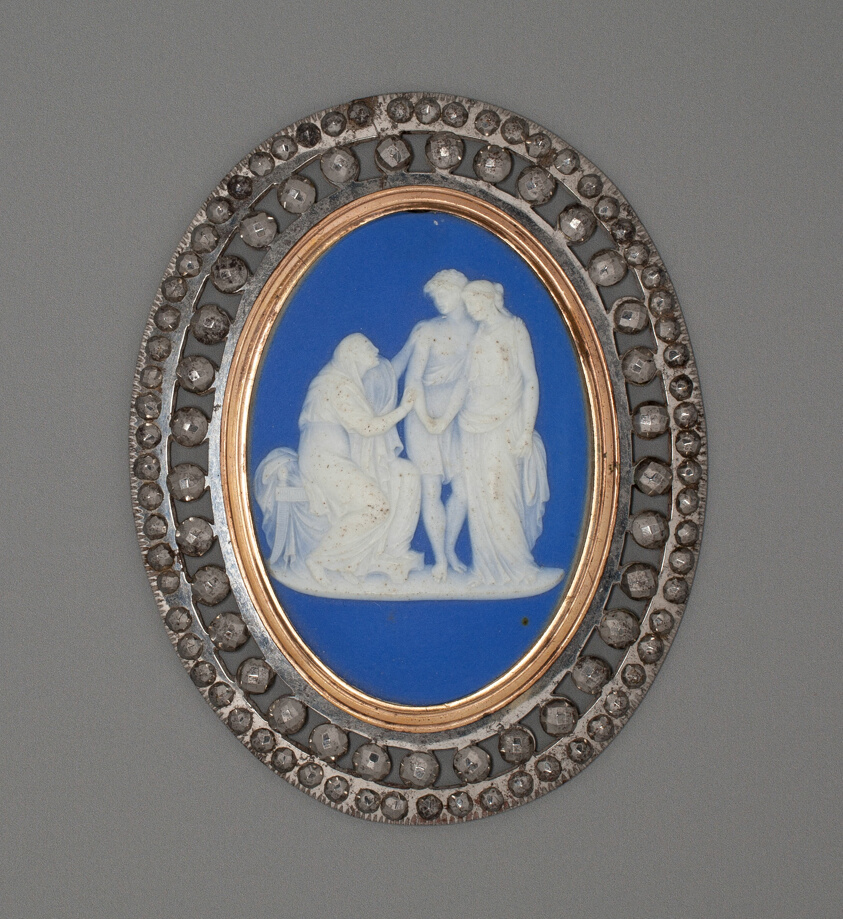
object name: Ceramics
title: Medallion with Coriulanus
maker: Wedgwood Manufactory (England, founded 1759)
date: Late 18th century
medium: Stoneware (jasperware)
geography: Burslem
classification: sculpture; stoneware; european decorative arts; ceramics